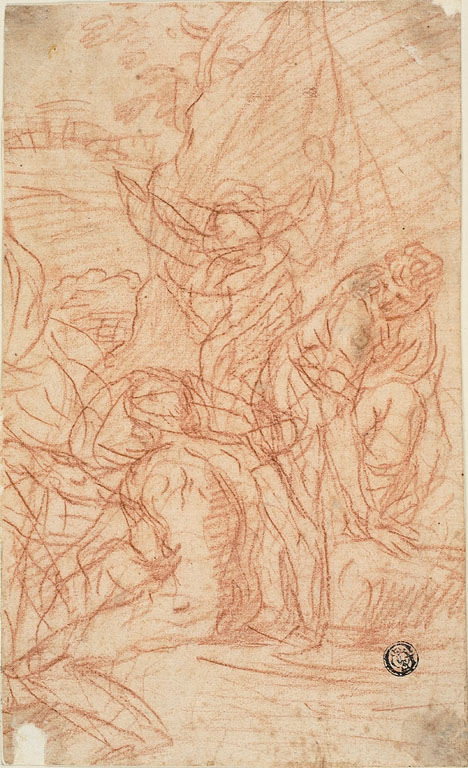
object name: Drawing and Watercolor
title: Nymphs Bathing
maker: Simone Cantarini (Italian, 1612-1648)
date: 1642/48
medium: Red chalk on cream laid paper, laid down on ivory laid paper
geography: Italy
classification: chalk; drawings (visual works); prints and drawing